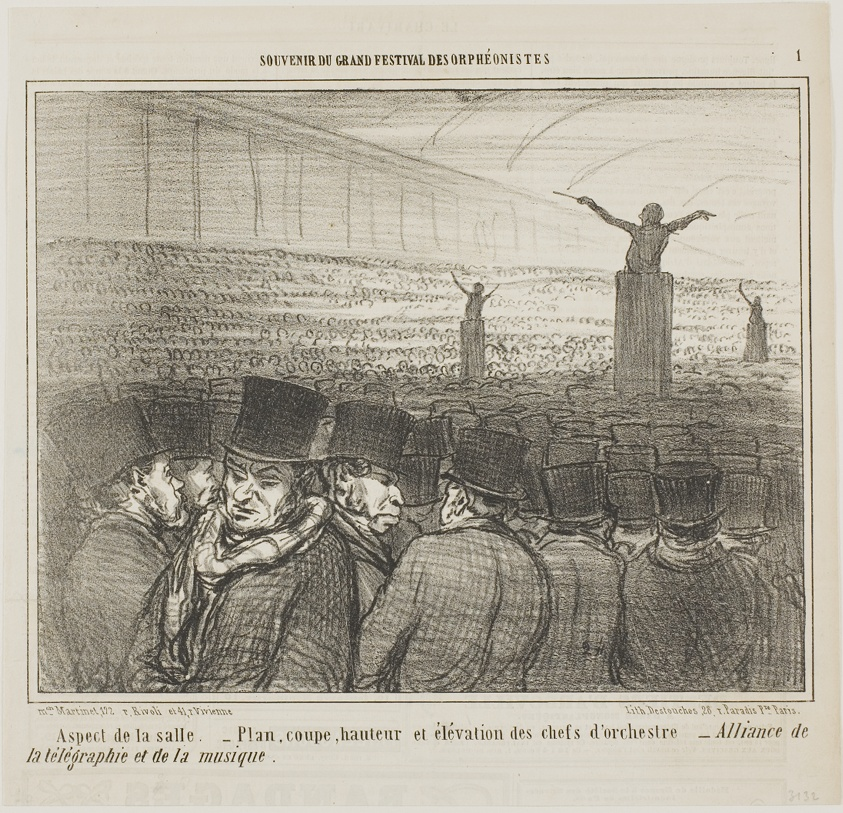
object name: Print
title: View of the Grand Hall, plate 1 from Souvenirdu Grand Festival des Orphéonistes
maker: Honoré Victorin Daumier; French, 1808-1879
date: 1859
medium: Lithograph on buff wove paper, with letter press, verso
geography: France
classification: lithograph; print; prints and drawing